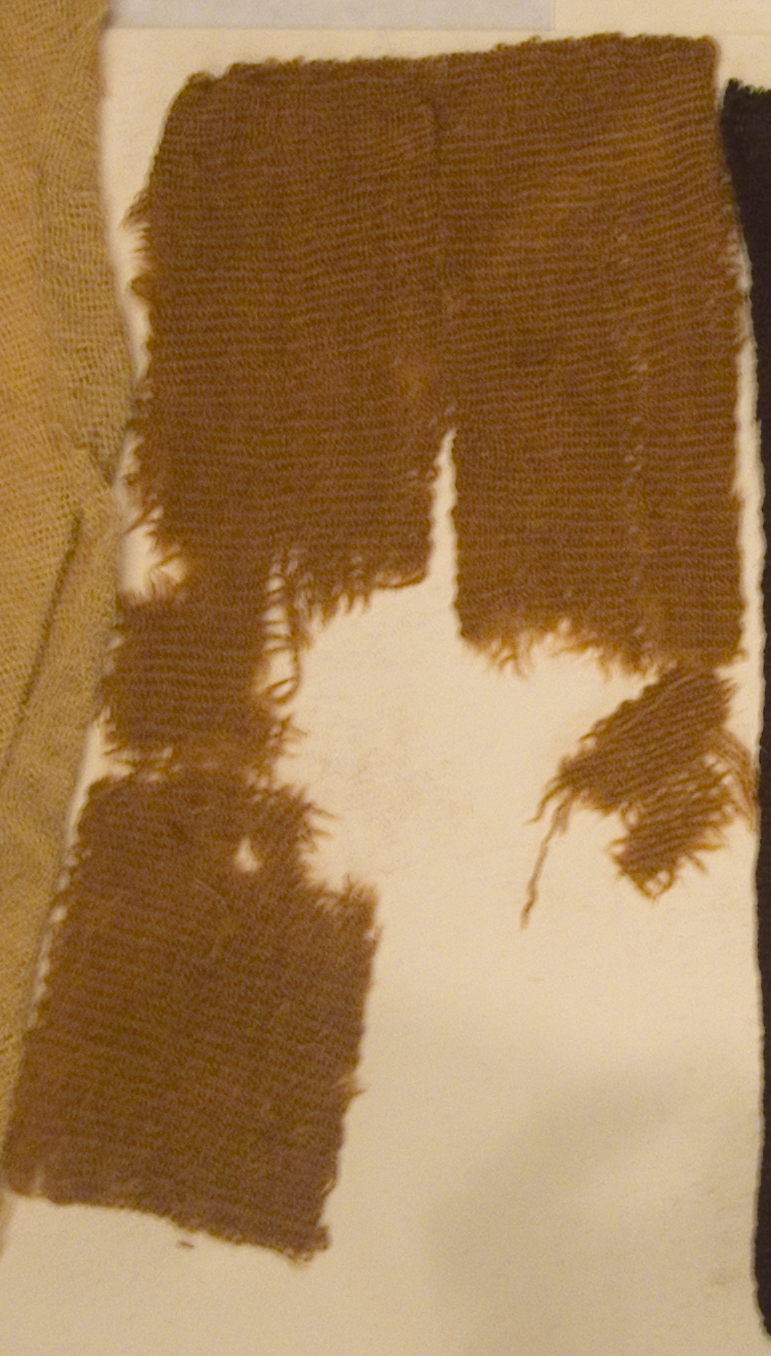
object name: Textile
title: Fragment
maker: Peru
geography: Peru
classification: textile; weaving